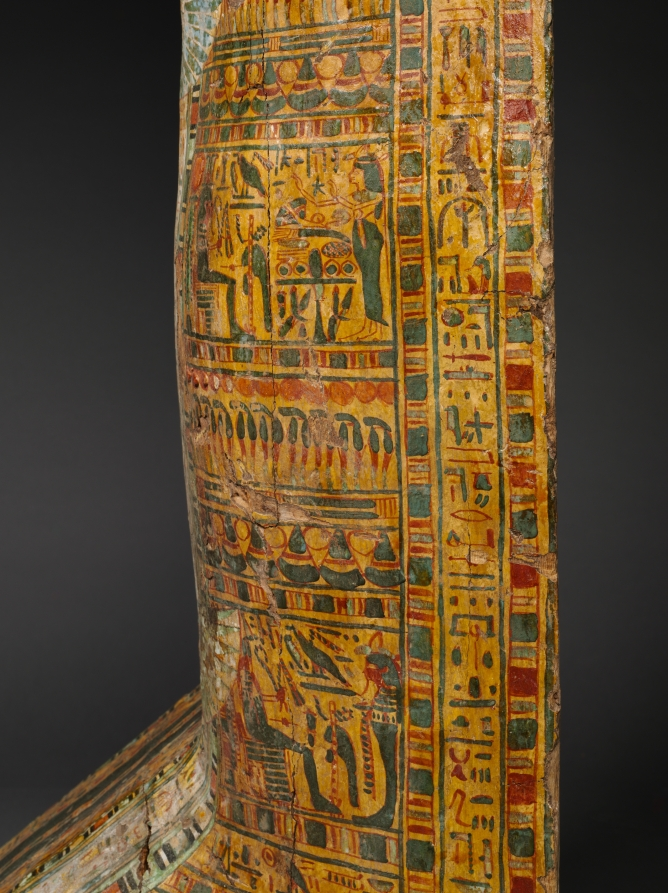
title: Coffin of Nesykhonsu (lid)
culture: Egypt, Third Intermediate (1069–715 BCE), Dynasties 21–22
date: c. 976–889 BCE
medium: gessoed and painted sycamore fig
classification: Funerary Equipment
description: A complete set of coffins during the late New Kingdom and Third Intermediate Period consisted of an outer and inner coffin and a mummy board (essentially a lid without a case, placed directly over the wrapped mummy). Judging by its size, this must have been Nesykhonsu's outer coffin. The type is essentially the same as the coffin of Bakenmut, which was also an outer coffin. The two coffins are said to have been found together and to have belonged to a man and wife. This is quite possible, although the inscriptions do not bear it out. Bakenmut is not mentioned on Nesykhonsu's coffin, nor is she mentioned on his. There was by this time a tremendous repertoire of scenes appropriate for coffin decoration. Whereas Bakenmut's coffin features images of deified dead pharaohs, Nesykhonsu's is decorated in a more personal way with scenes from her own funeral. The main scene in the interior (near the top) shows a priest clad in a panther skin with the mummy of Nesykhonsu behind. The god appears in mummy form and wears a sun disk on his head. The scarab beetle inside the sun disk identifies him as Khepri, the morning sun, and the hieroglyphs to the right identify him as Atum, the evening sun. Taken together, image and text represent the sun god in both his rising and setting, youthful and aged aspects.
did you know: Two of Nesykhonsu's titles, "Lady of the House" and "Singer of the Choir of Mut the Great," are written on the outside of the coffin.